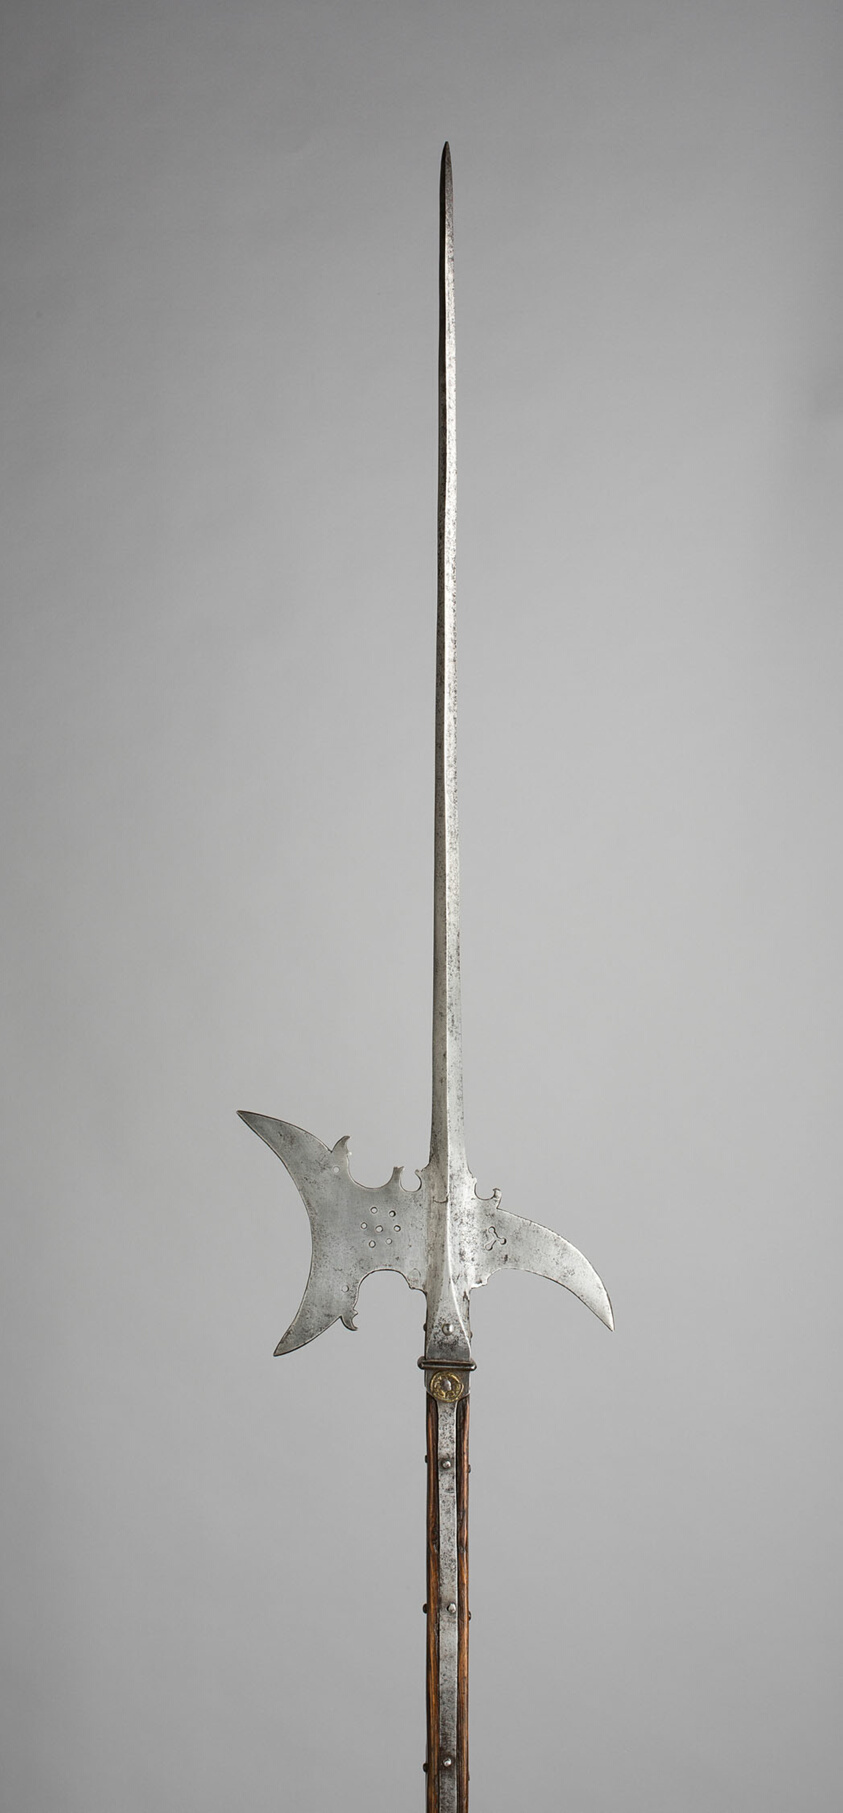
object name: Arms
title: Halberd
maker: Western European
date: 1600-25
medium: Steel, brass, and wood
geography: Western Europe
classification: edged weapon-staff; arms; arms and armor